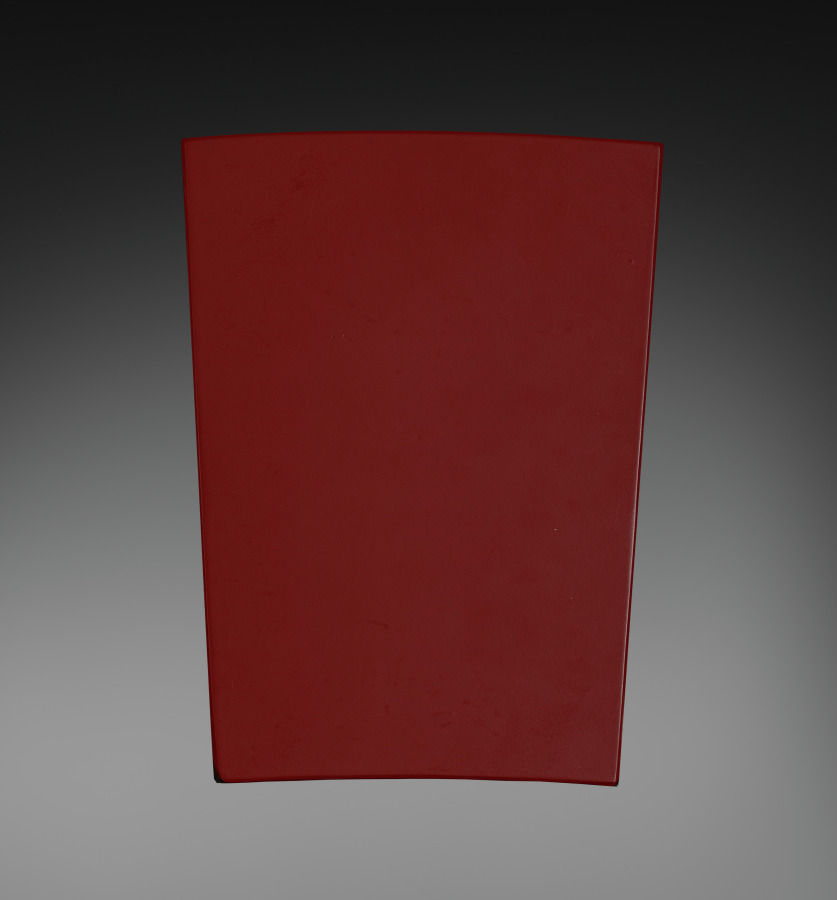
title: Section of the Two Pigeons Panel (Panneau deux pigeons)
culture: France, 20th century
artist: René Lalique (French, 1860–1945)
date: 1914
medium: molded glass with mirrored backplate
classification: Glass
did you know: The title of this work translates to curved panels with two pigeons.